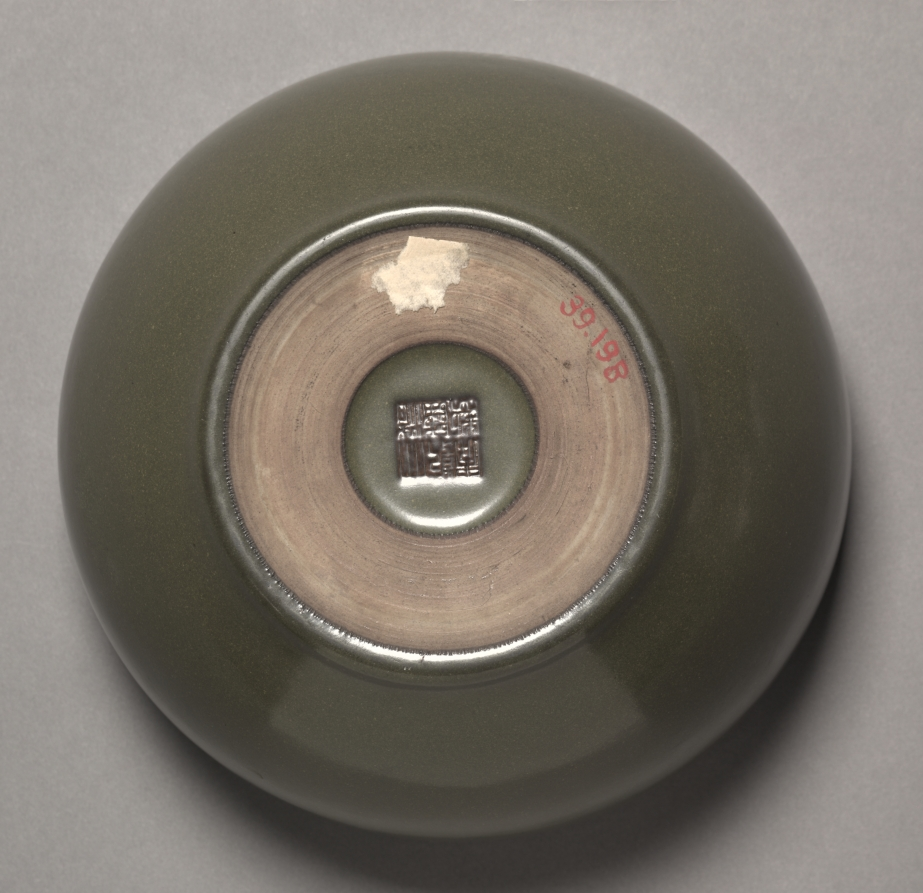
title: Bowl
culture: China, Qing dynasty (1644-1911), Qianlong mark and reign (1736-1795)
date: 1736–95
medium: porcelain with "tea-dust" glaze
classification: Ceramic